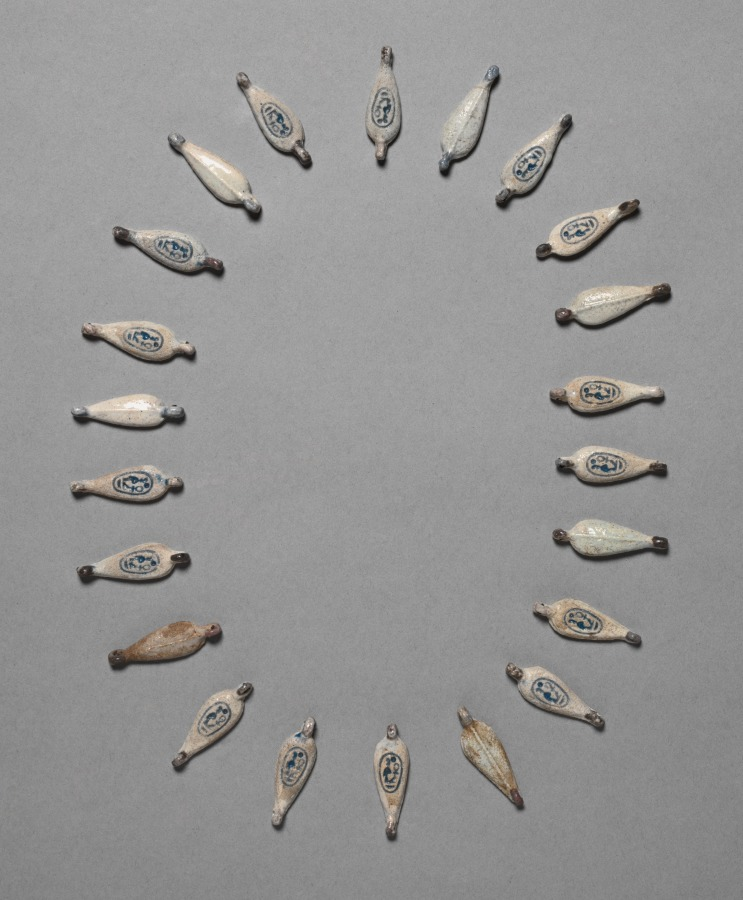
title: Petal-Shaped Beads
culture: Egypt, New Kingdom (1540–1069 BCE), Dynasty 18, reign of Amenhotep III (1390–1352 BCE)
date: c. 1391–1353 BCE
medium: faience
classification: Jewelry